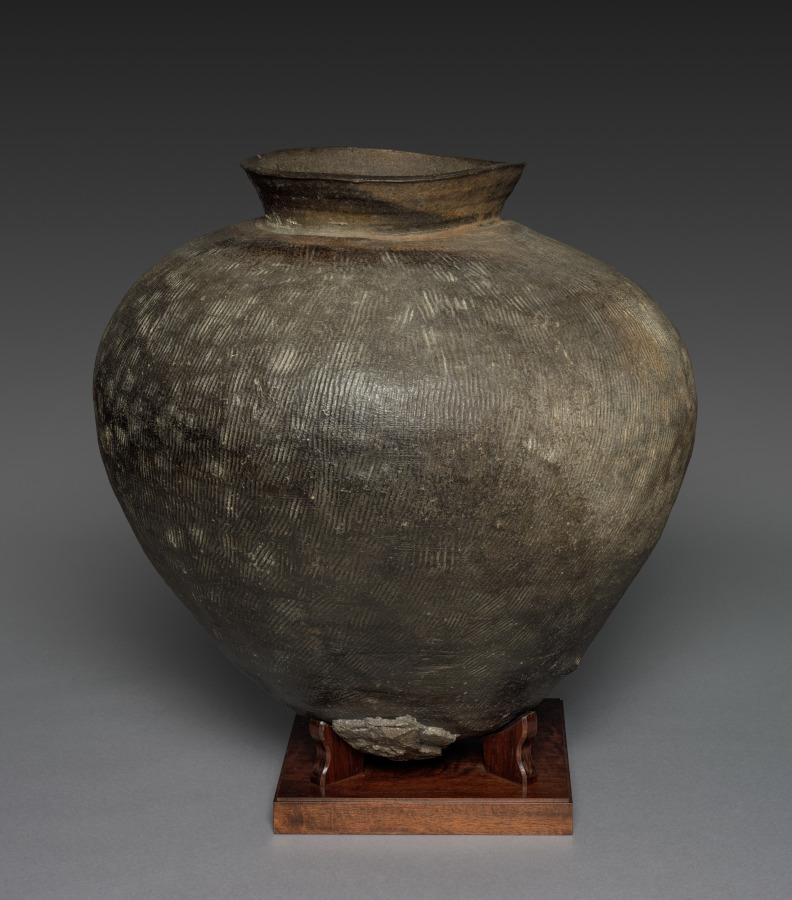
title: Storage Jar: Sueki ware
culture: Japan, Nara period (710–94)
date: 700s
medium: stoneware with incised and impressed decoration and natural ash glaze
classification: Ceramic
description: This robust vessel was formed from clay coils that were beaten inside and out with wooden paddles to compress the body walls and merge the coils. In addition, the exterior surface was paddled and scored with carved wooden tools to decorate the body walls. Finally, the vessel was turned on a potter's wheel to attach the neck with a smoothly finished surface. A high firing (approximately 1000°), which culminated with a reduced oxygen phase, produced the dark gray surface tone. Sueki ware ceramics originated in the mid-400s, when Korean potters and kiln builders established clusters of kilns in the modern Osaka area. Other production centers were established in the outlying provinces by the late 500s, providing for the diffusion of this ceramic ware throughout the country into the 1000s. Sueki wares demonstrate ancient Japan's close cultural ties with the Korean peninsula. Similar vessels have been recovered from sites in the southern regions of the Korean peninsula.